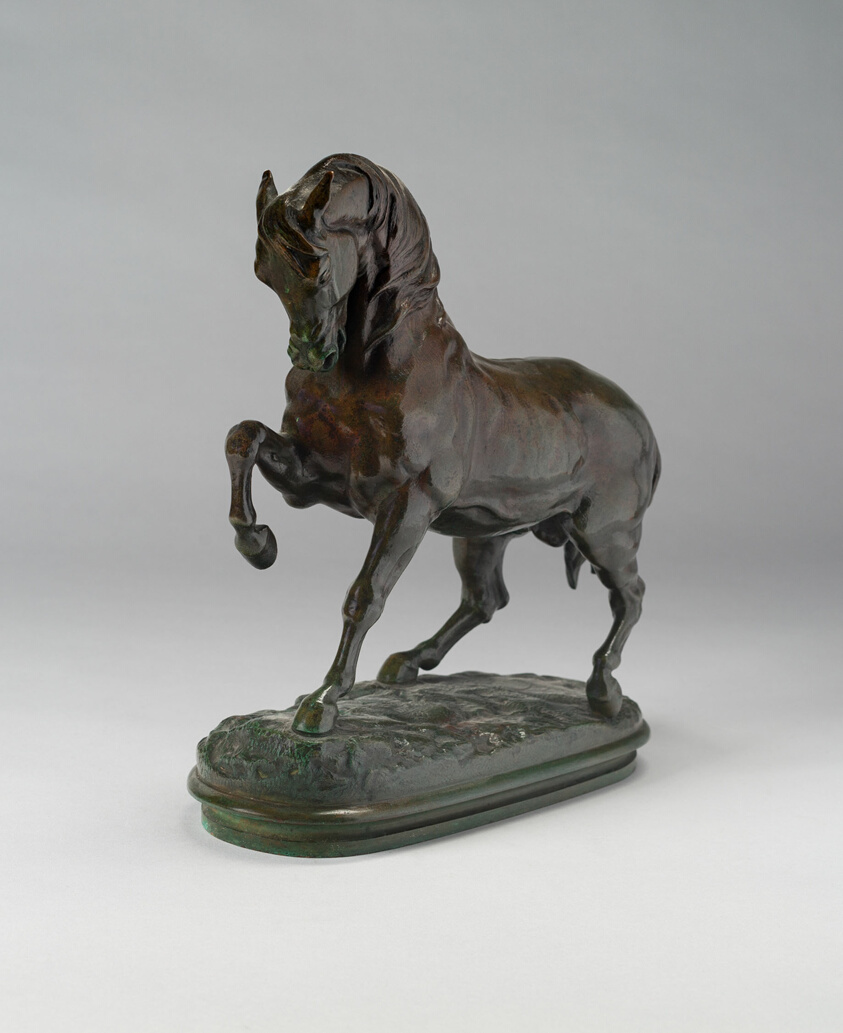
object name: Sculpture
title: Cheval Turk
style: nineteenth century, 19th century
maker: Antoine Louis Barye (French, 1795–1875)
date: 1850/1900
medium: Bronze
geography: France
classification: statuette; french; sculpture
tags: horse, horses, animals